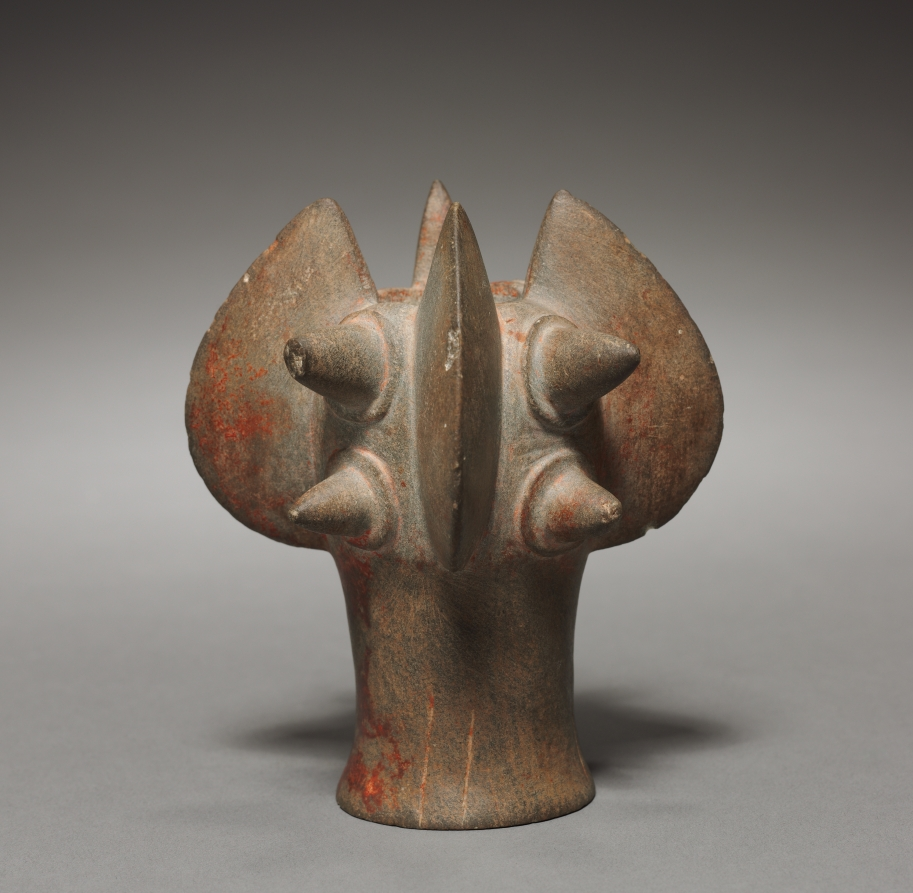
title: Mace Head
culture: North coast of Peru, Salinar culture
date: c. 200 BCE–100 CE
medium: stone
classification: Stone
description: This handsome object was slipped onto a wooden shaft to form a mace, a club-like weapon used in war. It is unclear, however, whether the ancients used examples as well carved as this one in anything but ceremonial circumstances.